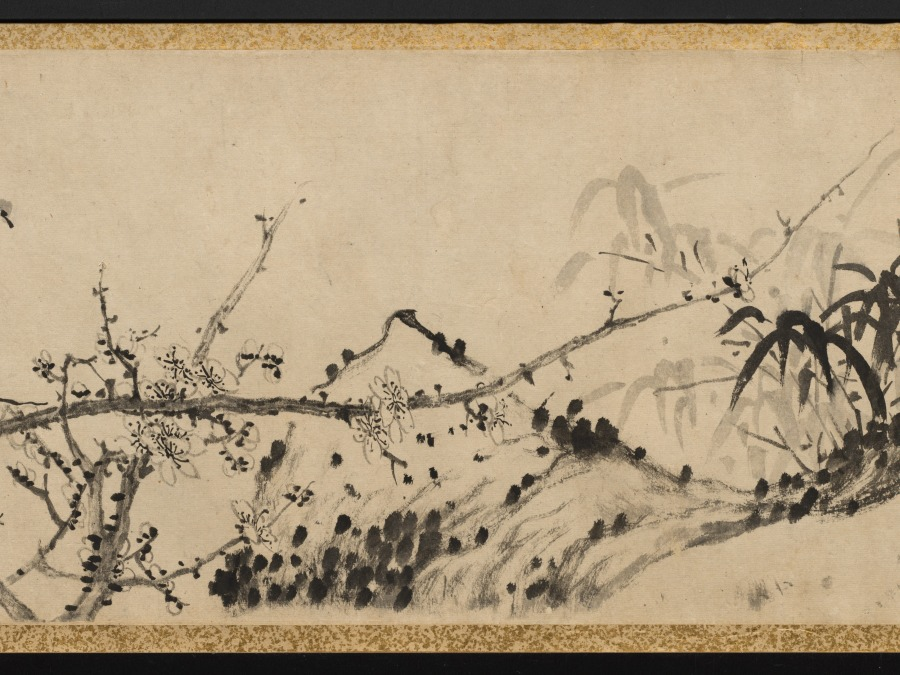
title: Plum Blossoms and Peonies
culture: China, Qing dynasty (1644-1911)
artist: Gao Fenghan (Chinese, 1683–1749)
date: 1741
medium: handscroll, ink on paper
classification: Painting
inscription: Artist's 2 inscriptions and 9 seals (the painting of Peonies with the artist's colophon and the colophon by Hou Chia-fan are on a single sheet of paper). Artist's inscription and 2 seals (Plum Blossoms): [seal] Ts'ai-yün. After finishing writing my colophon, I unrolled the painting to take another look, and it now seems that the composition here should have moved to the later part of the scroll. If that is the case, then the "Cool Beauty" [prunus] of the Solitary Hill is after all unable to take precedence over the "King of Flowers" [peony]. A laugh. Lao-fou inscribed. [seal] Feng-han. Artist's colophon (Plum Blossoms): [3 seals] Tun; Yen-yün-kung-yang, Hou-shang-tso-sheng. A few days after I painted this scroll for Shui- hsien [Yüeh Meng-yüan], the plum blossoms were in full bloom at his residence. He invited me over to enjoy them together for a long while, and I composed two additional poems and wrote them down here for his criticism. [Poems on the colophon are not translated.] First month, twenty-first day, your junior, Kao Feng-han of Nan-fou drafted this with the left hand. [seal] Feng-han. Artist's inscription and 4 seals (Peonies): Brushed with the left hand in the hsin-yu year [1741]. [seal] Yu-hsi. [3 seals at end of painting] Hou-shang-tso-sheng; Yen-yün-kung-yang; Shih-tsao-wu. Artist's colophon and seal (Peonies): The imperial concubine from the Yang family loved to dress in red, And from the emperor won the title of Hai-t'ang. But ever since she became the new dream of the moon palace, She changed into rainbow colors, while learning to dance. After I wrote the poem on Looking for Plum Blossoms in the Teng-wei Mountains, I attached to it a few branches of prunus, some bamboo tips and a piece of rock, with a scattering of green [moss] here and there to fill up the scroll. Unexpectedly, my playful fascination [with these subjects] was still not quite satisfied, so I made up these amorous ideas and romantic images [of the peony], to follow the footsteps of the fair lady of the Ku-hsieh Mountain [prunus]. Furthermore, I picked out one poem to be my vanguard. Perhaps such luminosity of wealth and power will be enough to overwhelm the poor fellows, and [they] will not mind the comparatively short length [of paper] assigned to it. Amusingly inscribed. Please correct me again. To Shui-hsien, my learned senior, your junior Han inscribed again. [seal] Tso-hua [left-handed painting]. 1 additional colophon and 5 additional seals: 1 colophon, dated 1742, and 3 seals of Hou Chia-fan (act. ca. 1742); 1 seal of P'u Ch'üan (20th c.?); 1 seal of Li family (dates unknown).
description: One of the so-called Yangzhou Eccentrics (a group of painters who lived in Yangzhou and were known for their unorthodox art and lifestyle), Gao Fenghan depicts China’s two most loved flowers in full bloom—the “cold beauty,” or plum blossom, in the first section, and the “king of flowers,” or peony, in the second section. Painted in 1741, the year when Gao decided to leave the south and return home to Shandong province in eastern China, this work was likely a token of farewell. His casual brushwork may indicate his mental and physical struggle at the time. After having crippled his right hand in 1737, Gao used his left hand to paint and achieved a crudeness and eccentric style unattainable before.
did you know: In East Asian art, peonies traditionally symbolize prosperity and wealth.